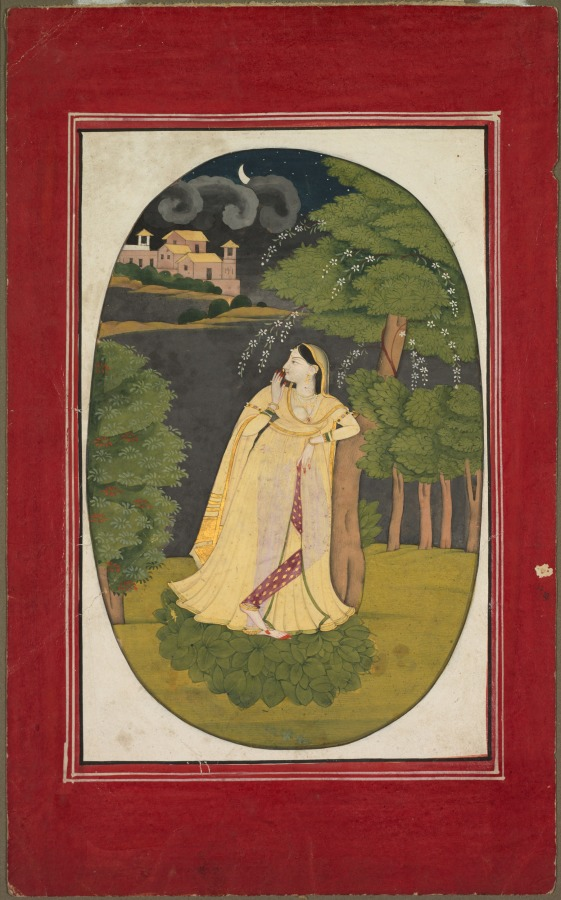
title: The heroine who waits anxiously for her absent lover (Utka Nayika)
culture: Northern India, Pahari kingdoms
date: c. 1800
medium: Gum tempera on paper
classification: Painting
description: Inspired by devotional poetry that likens the waiting for divine favor to that of a woman alone in the forest waiting for her lover, Pahari painters mastered portrayals of this subject. Darkness has fallen, but the moon and stars and jasmine flowers brighten the night. However, monsoon clouds approach in the distance, suggesting impending danger and misery. Her gesture and expression suggest a mixture of hope and heightened uncertainty about how much longer she should continue to wait.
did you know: Utka Nayika is often shown standing or resting on a bed of leaves.